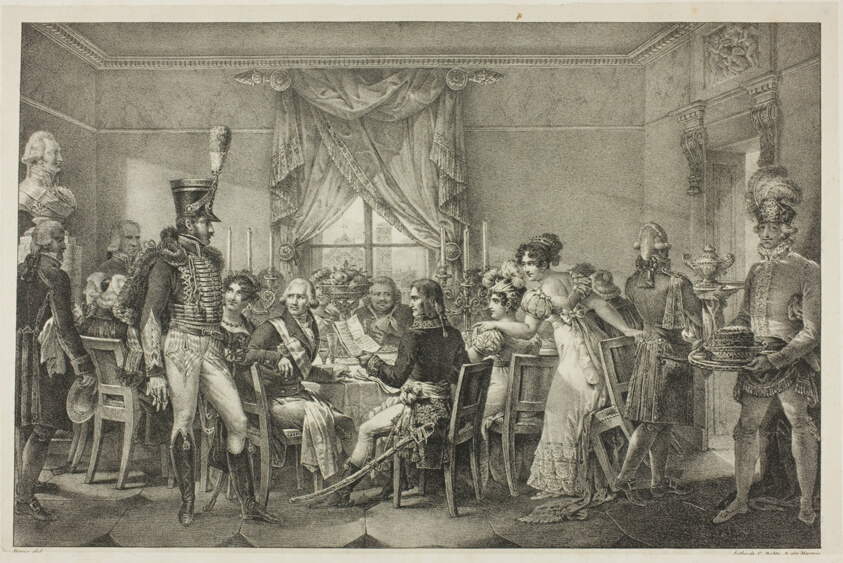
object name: Print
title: Napoleon at the Palace of the Grand Duke in Florence, plate thirteen from The Political and Military Life of Napoleon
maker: Jean François Bosio (French, 1764-1827); published by Charles Étienne Pierre Motte (French, 1785-1836); Arnault A. V. (French, born 1822)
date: 1822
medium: Lithograph in black on ivory China paper laid down on white wove paper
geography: France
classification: lithograph; print; prints and drawing